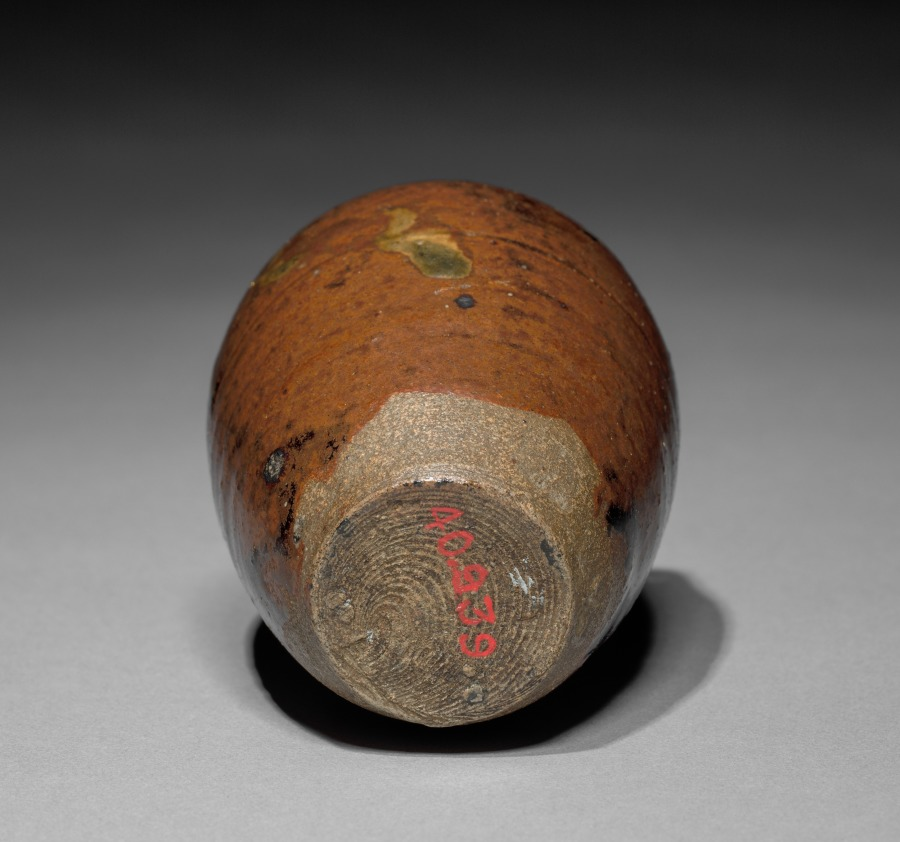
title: Tea Caddy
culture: Japan, Edo period (1615–1868)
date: 1700s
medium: porcelain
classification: Ceramic